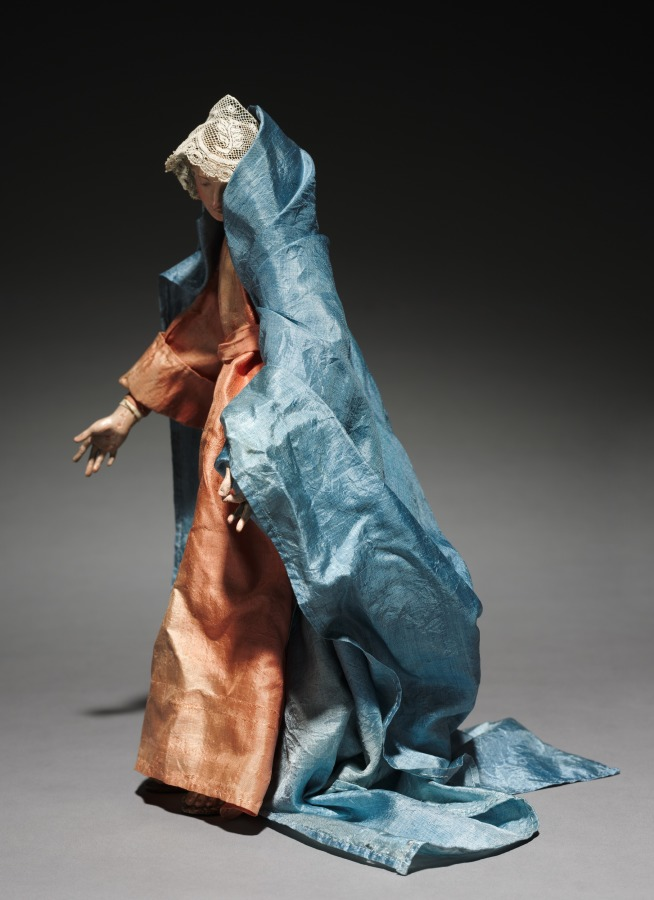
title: Figure from a Crèche: Virgin Mary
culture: Italy, Naples, late 18th-early 19th century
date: 1780–1830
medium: painted wood and terracotta with various textiles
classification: Sculpture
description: The practice of creating scenes of the Nativity for the home dates from the early 1700s in Italy, where people began to set up doll-like figures of about a foot or less in height. The custom was particularly popular in Naples around 1800, where crèche scenes (crèche means cradle, or crib) included many figures, whose heads and hands of painted terracotta, stuffed cloth bodies, and clothing adapted from contemporary local costumes gave them an amazingly realistic character. Representations of the birth of Jesus can be traced to the first few centuries of Christianity. Both living creatures and sculptural depictions of them were used from early times. By the late middle ages it was customary to create life-size figures of wood or stone, naturalistically painted, to represent the characters who participated in the events of Jesus's early life. These sculptures were then arranged in scenes illustrating one or both of the most important of these events, the Adoration of the Shepherds and the Adoration of the Magi-the three kings from the East who came to pay homage to the Christ child. Used in churches, these large figures were especially popular in Italy, Central Europe, Spain, and Portugal.